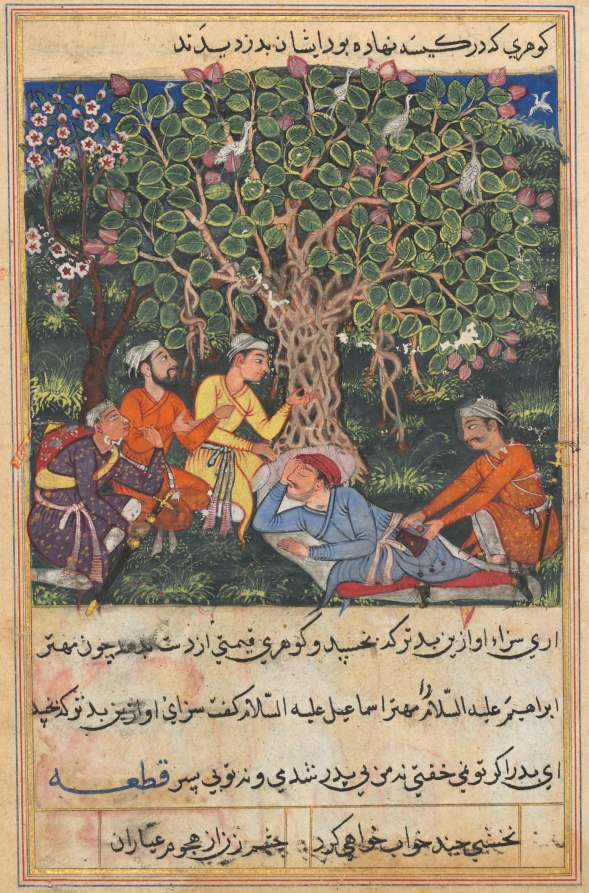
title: The street cleaner, on his way to meet King Bhojaraja, sleeps under a tree where four thieves disguised as fellow travelers deprive him of a priceless pearl, from a Tuti-nama (Tales of a Parrot): Twelfth Night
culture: Mughal India, court of Akbar (reigned 1556–1605)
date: c. 1560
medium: gum tempera, ink, and gold on paper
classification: Painting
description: Many scholars consider the diminutive Tuti-nama to have been one of the first illustrated manuscripts made for Akbar, on which Indian artists worked with Persian masters to formulate a new style that their exacting emperor appreciated. The new Mughal style would be used to create the monumental Hamza-nama and hundreds of other Mughal manuscripts. There are many continuities between the Tuti-nama and the Hamza-nama, such as the image of a recumbent figure under a magnificent tree.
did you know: The body of the thief has been overpainted and repositioned.